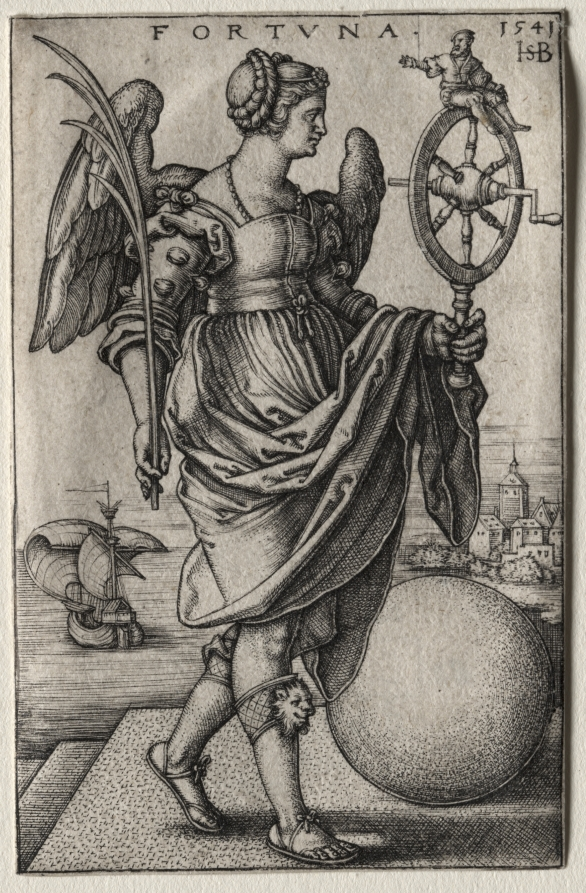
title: Fortune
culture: Germany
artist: Hans Sebald Beham (German, 1500–1550)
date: 1541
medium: engraving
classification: Print